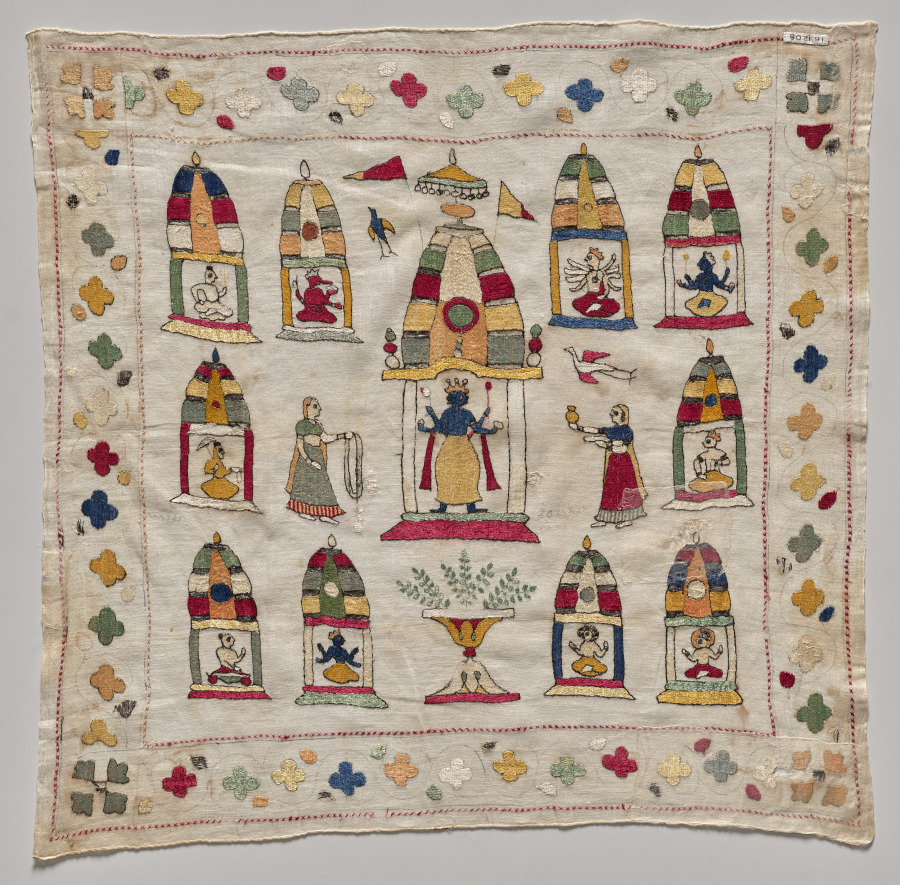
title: Rumal with Vishnu temple and subsidiary shrines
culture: Northern India, Pahari Kingdom of Chamba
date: 1700s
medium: Silk and silver embroidery on cotton tabby ground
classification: Embroidery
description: Two women bring gifts of pure water in a golden pot along with a flower garland to the four-armed blue Vishnu, whose favorite plant, the Tulsi basil, grows in an altar in front of the temple. Ten more shrines round out the sacred complex. To the upper right, the temple of Shiva with his trident stands next to that of his red, elephant-headed son, Ganesha. To the lower left, there appears to be temples to the sun and moon. Silver threads used to denote jewelry have tarnished and appear black. The unfinished border reveals that outlines and stitches for the vines were sewn last.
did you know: This reversible embroidery was made using double-sided satin stitch, so the pictorial composition can be viewed from both sides.